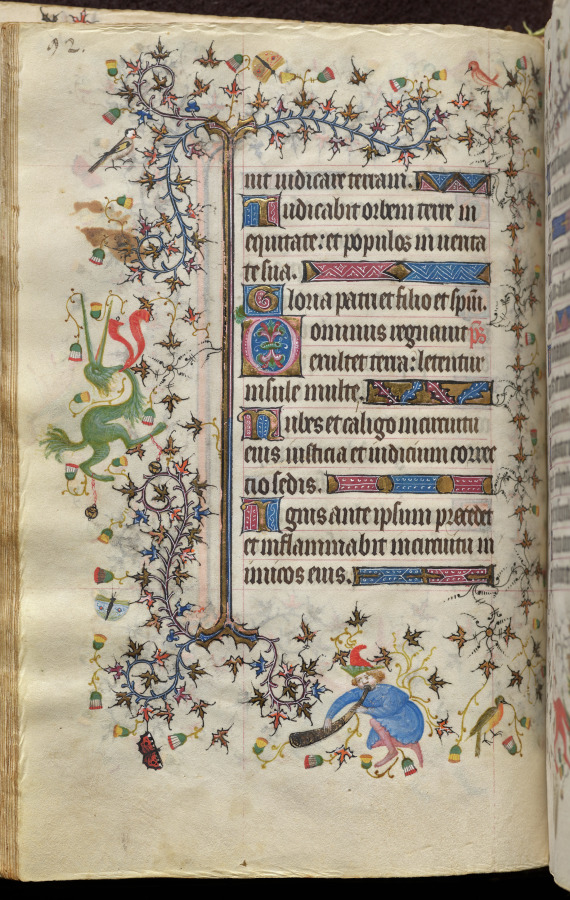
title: Hours of Charles the Noble, King of Navarre (1361-1425): fol. 46v, Text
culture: France, Paris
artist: Master of the Brussels Initials and Associates (French)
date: c. 1405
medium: ink, tempera, and gold on vellum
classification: Bound Volume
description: This precious volume was obviously highly prized by its owner, the French-born King of Navarre, who had his coat of arms painted on no less than twenty folios. Rather than directly commissioning this manuscript from a specific workshop, it seems that Charles the Noble acquired his book of hours -- perhaps ready-made for the luxury market -- while on a trip to Paris in 1404-05. A collaborative effort, six painting styles are evidenced within the pages of this codex, those of two Italians, two Frenchmen, and two Netherlanders. The painter who was responsible for the planning and decoration of the book, and who produced seventeen of the large miniatures, was a Bolognese artist known as the Master of the Brussels Initials. His principal assistant, responsible for most of the borders, was a Florentine who signed his name "Zecho" da Firenze on folio 208 verso.